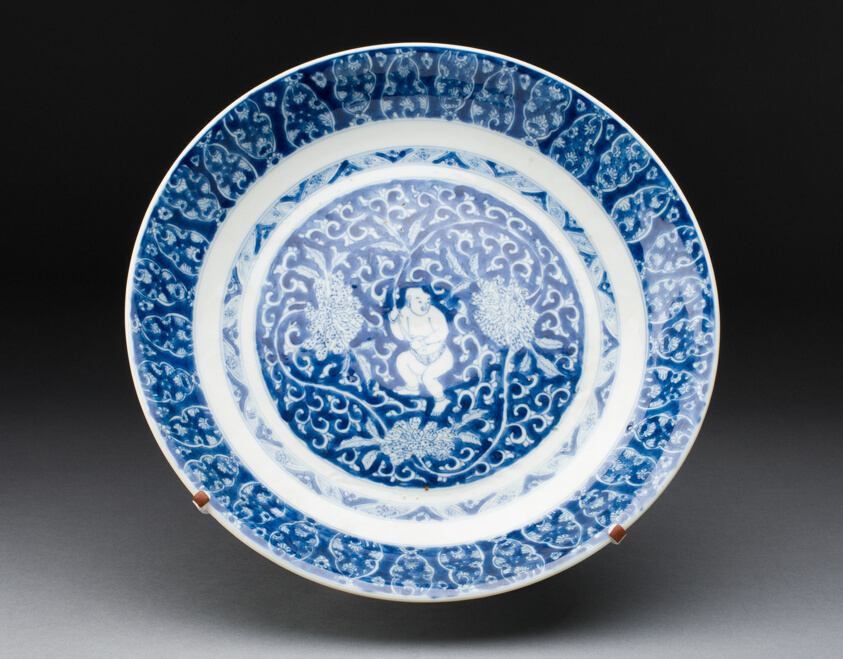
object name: Ceramics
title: Plate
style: chinese export, Chinese (culture or style), East Asian, asian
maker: China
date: 1662/1722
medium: Hard-paste porcelain with underglaze blue decoration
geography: China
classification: plate (general, dish); dish (vessel); chinese export porcelain; ceramics; porcelain; european decorative arts